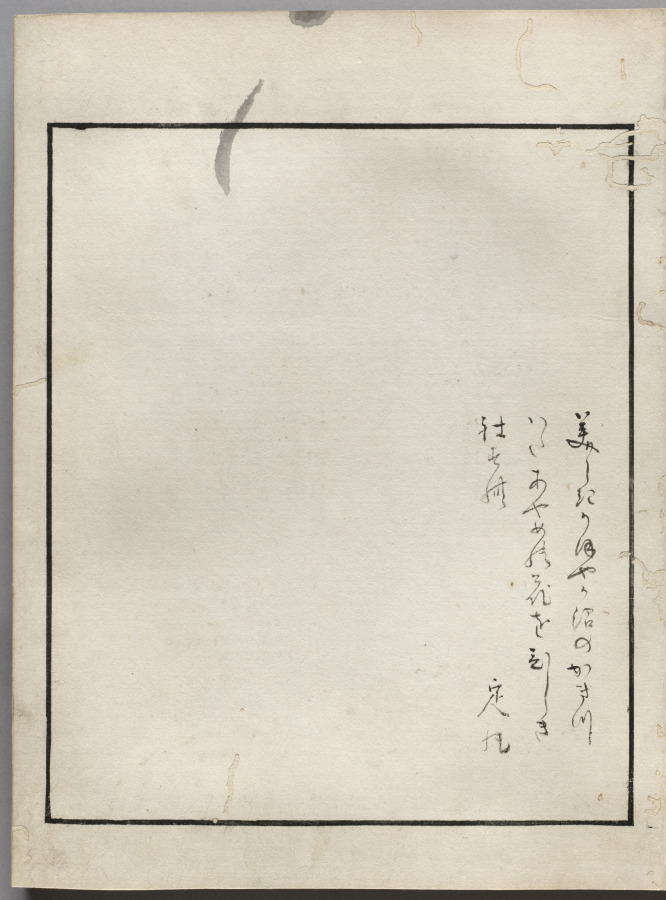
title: Double-Leaf from Album of Actor Portraits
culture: Japan, Edo period (1615–1868)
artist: Shōrakusai (Japanese)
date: c. 1790–1810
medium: double-leaf from an accordion-style album; ink and color on silk (right) and ink on paper (left)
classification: Bound Volume